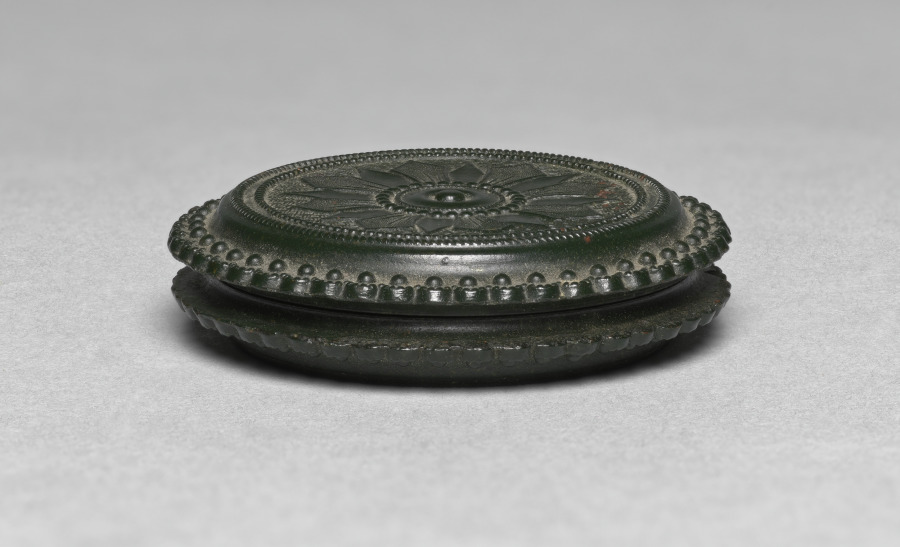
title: Portrait of a Young Woman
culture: America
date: c. 1855–60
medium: Tintype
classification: Photograph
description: It seemed a miracle that anyone could afford to have an accurate record of their own likeness or those of their loved ones. This portrait is an excellent example of the hundreds of thousands of portraits produced by commercial photographers in mid-nineteenth-century America. Small scale yet housed in an elaborately decorated thermoplastic case, it was intended to be carried by its owner or displayed on parlor tables or knickknack shelves.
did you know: During the first decades of photography, portraits far outnumbered every other type of image.